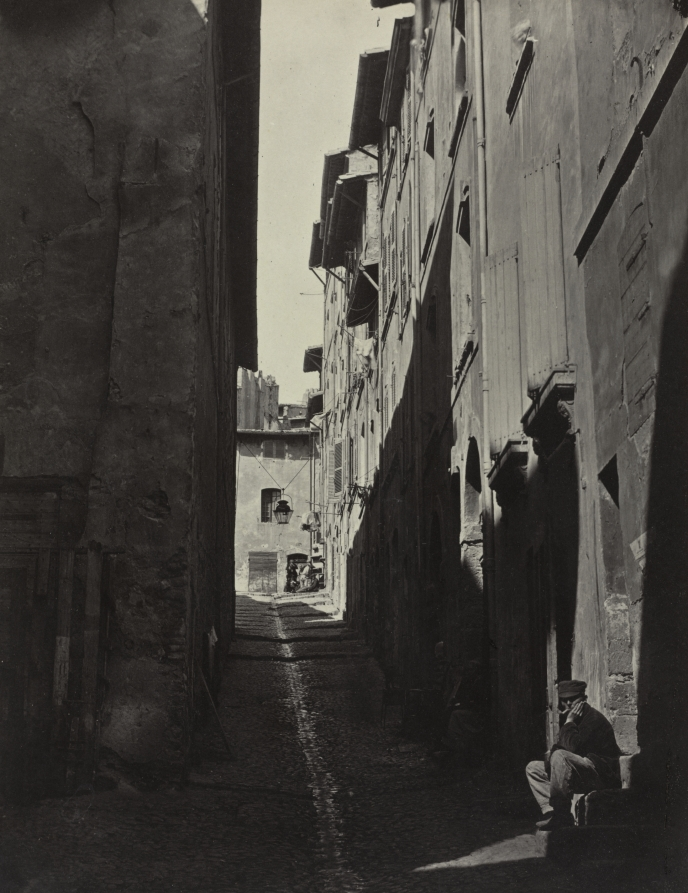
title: Renovation of the Old City of Marseille, Rue Caves de l'Oratoire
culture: France, 19th century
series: Joseph Méry, l'Histoire des rues de Marseille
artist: Adolphe Terris (French, 1820–1900)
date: 1862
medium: albumen print from wet collodion negative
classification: Photograph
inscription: Written in pencil on verso: "34"